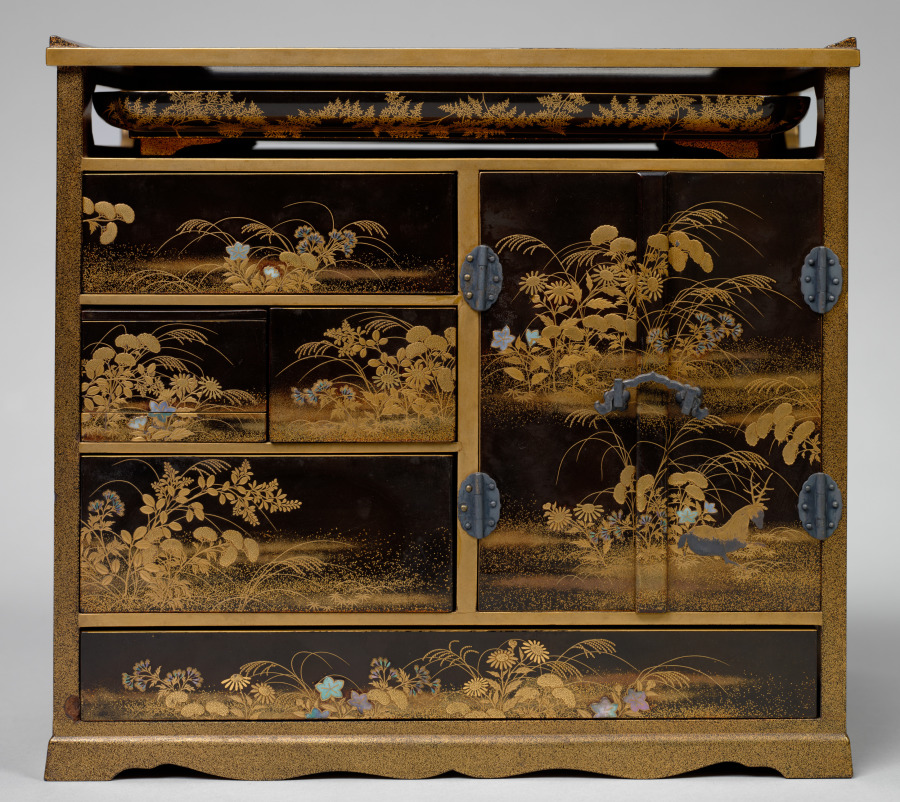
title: Ten-Round Incense Game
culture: Japan, Edo period (1615–1868)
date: 1700s–mid-1800s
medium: Lacquered wood with gold and silver sprinkled powder (maki-e) and mother-of-pearl inlay, metal fittings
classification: Lacquer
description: A popular pastime in the Edo period was a game in which a group of players passed around incense and guessed its name or scent. Small pieces of incense would be placed on thin mica plates and heated over hot ash, releasing their aroma for the players to smell. Players then cast their guesses with playing pieces. The game master kept score with the writing set. This game is handsomely decorated with images of deer in an autumn setting.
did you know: The blue and white porcelain containers in which the heated incense was passed feature designs of foreigners.